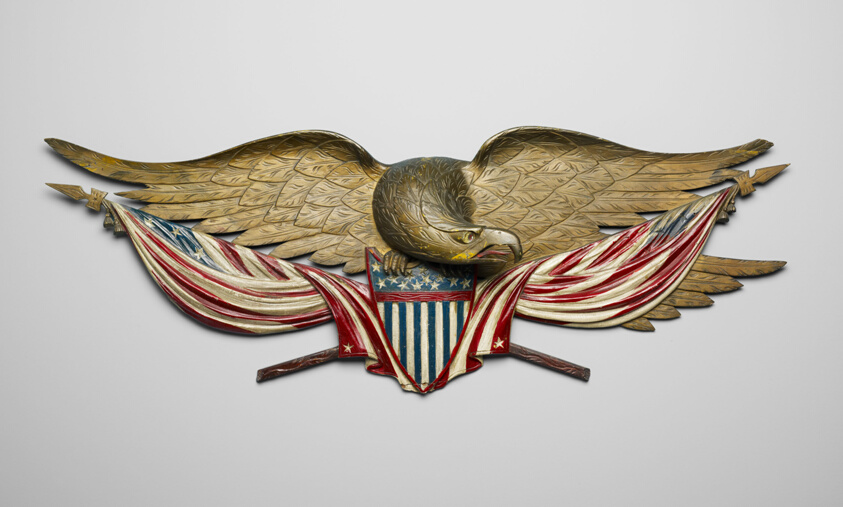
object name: Decorative Arts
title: Eagle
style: Folk Art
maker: John Haley Bellamy; American, 1836–1914; Probably Kittery Point, Maine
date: 1870–1900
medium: Pine, paint, and gold leaf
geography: Kittery Point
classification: sculpture; american decorative arts; american arts; decorative arts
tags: animals